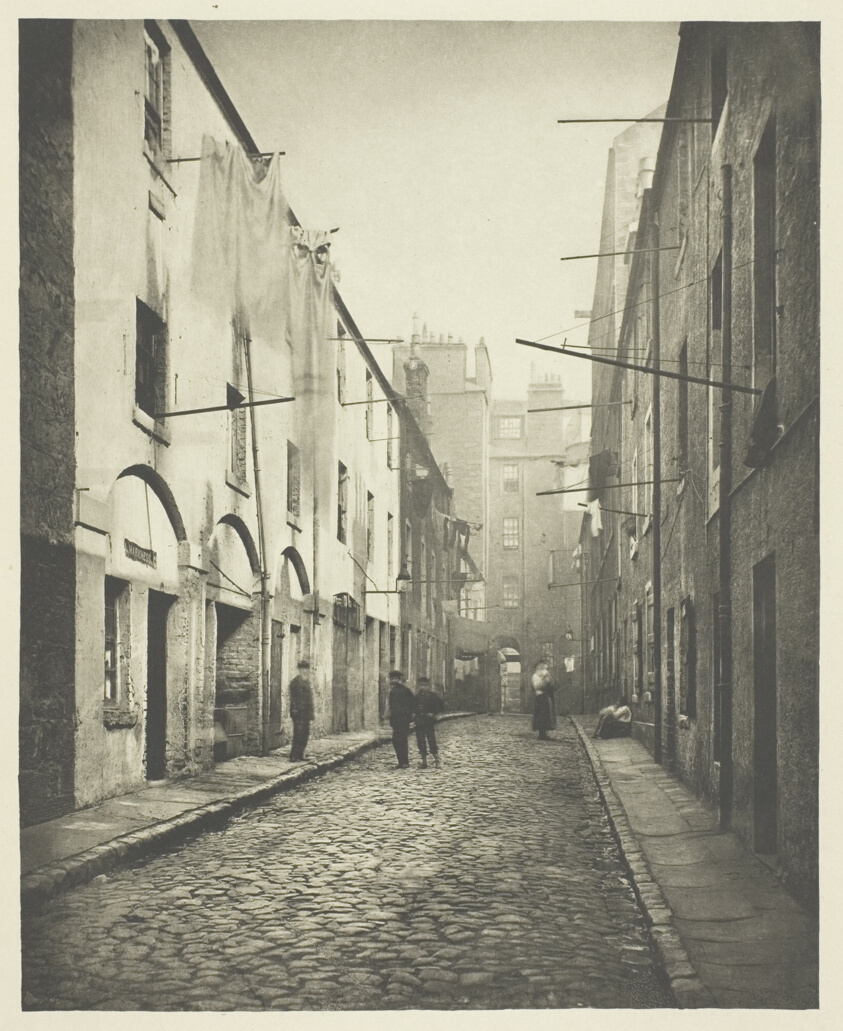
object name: Photograph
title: Broad Close No. 167 High Street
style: 19th century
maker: Thomas Annan (Scottish, 1829–1887)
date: 1868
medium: Photogravure, plate 3 from the book "The Old Closes & Streets of Glasgow" (1900)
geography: Scotland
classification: photograph; photography